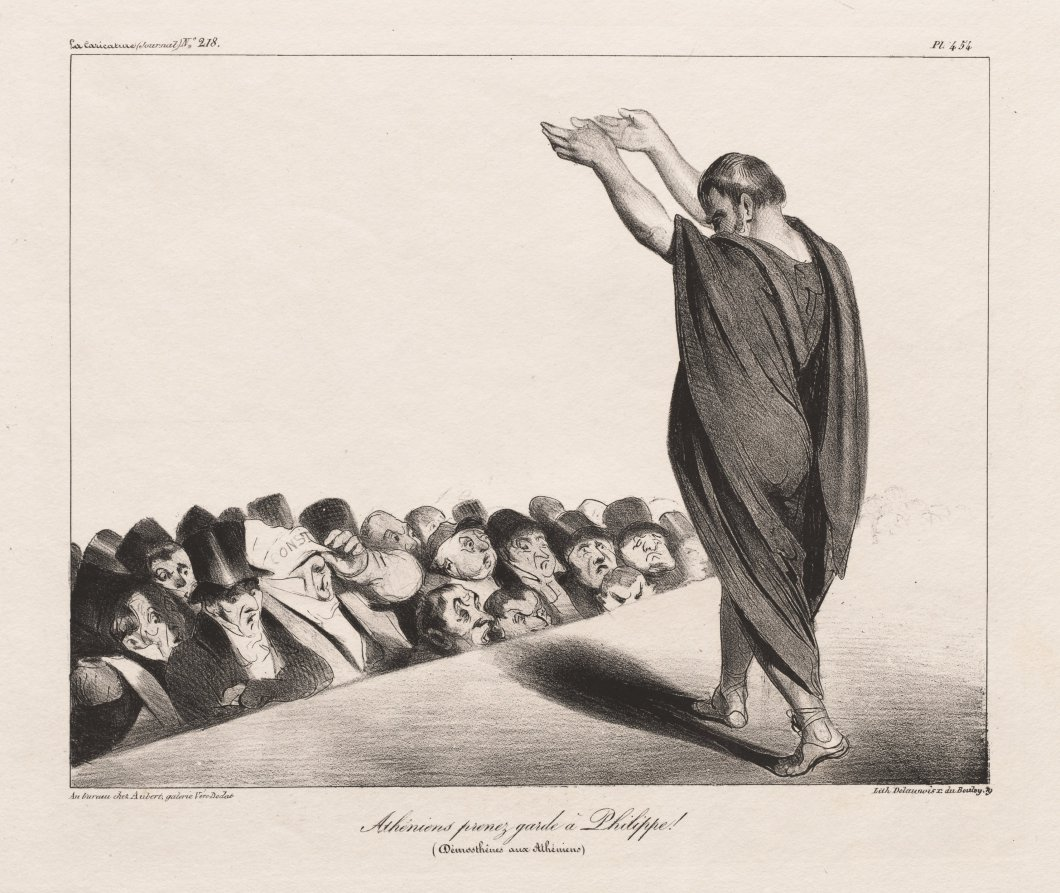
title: Athenians Beware of Phillip! (Demosthenes to the Athenians)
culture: France, 19th century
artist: Honoré Daumier (French, 1808–1879)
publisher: Aubert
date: 1835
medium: lithograph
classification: Print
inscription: Lower margin, printed: Au bureau chez Aubert, Galerie Vero-Dodat / Lith: Delaunois r. du Bouloy, 79 ; Lower left corner, pencil: 102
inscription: Above image, printed: La Caricature (Journal) No. 218 / Pl.454 ; Below image, printed: Athéniens prenez garde à Philippe ! / Démosthènes aus Athéniens).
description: This print was published in the journal La Caricature (No. 218, January 8, 1835) as plate 454.